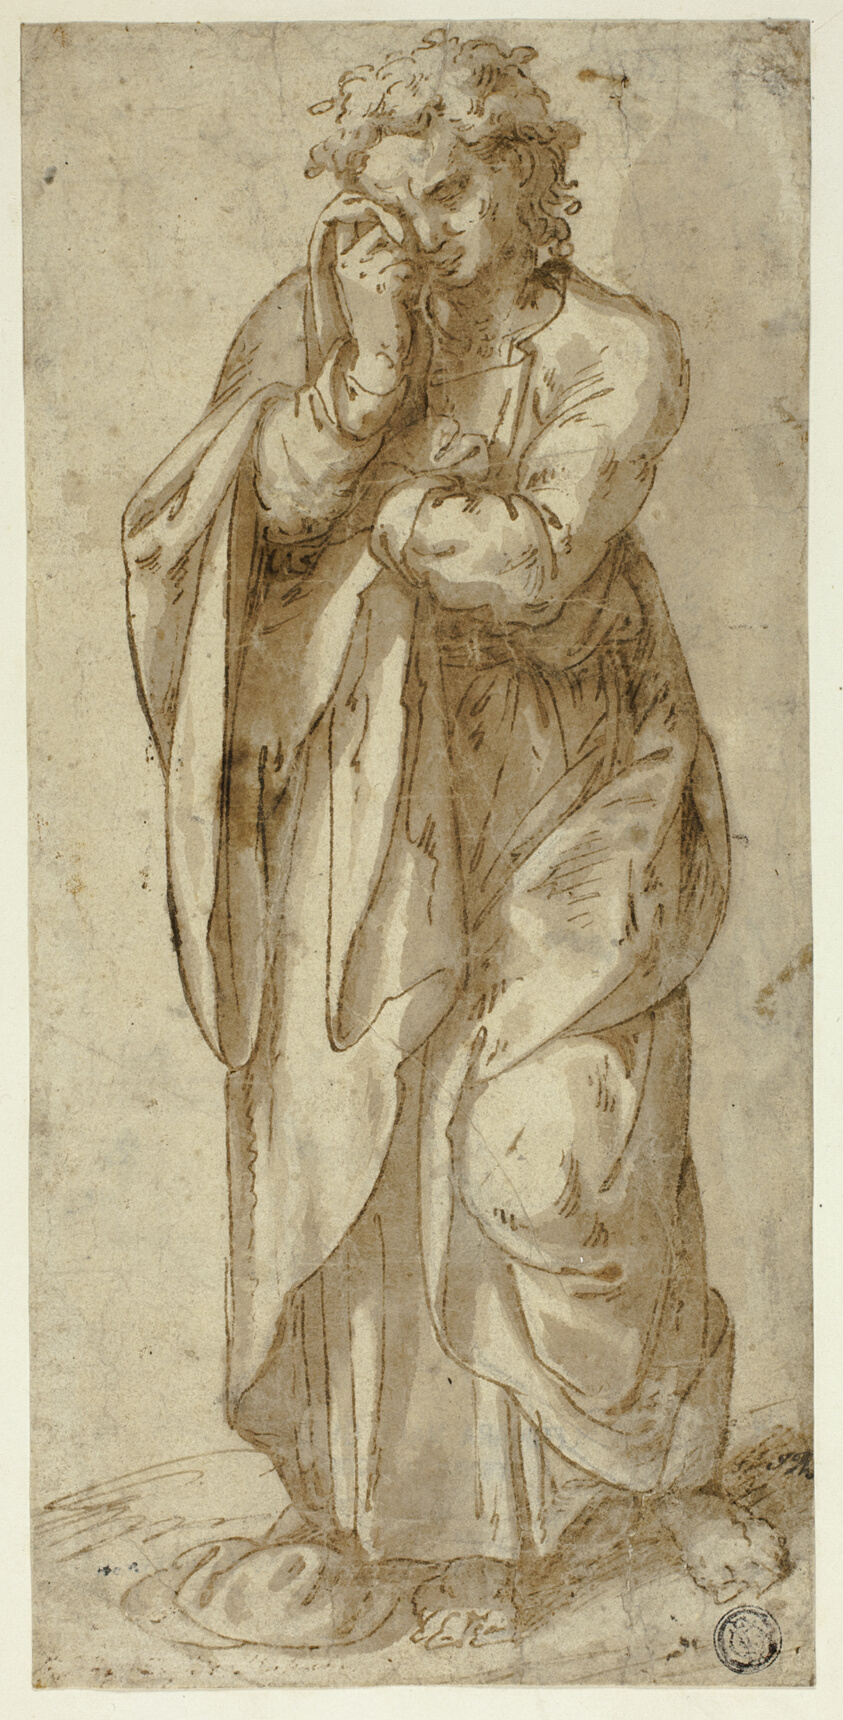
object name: Drawing and Watercolor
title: Weeping Saint John the Evangelist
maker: Unknown Artist; Italian. late 16th century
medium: Pen and brown ink with brush and brown wash over traces of black chalk, on cream laid paper, tipped onto ivory wove card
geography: Italy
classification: ink with wash; drawings (visual works); prints and drawing